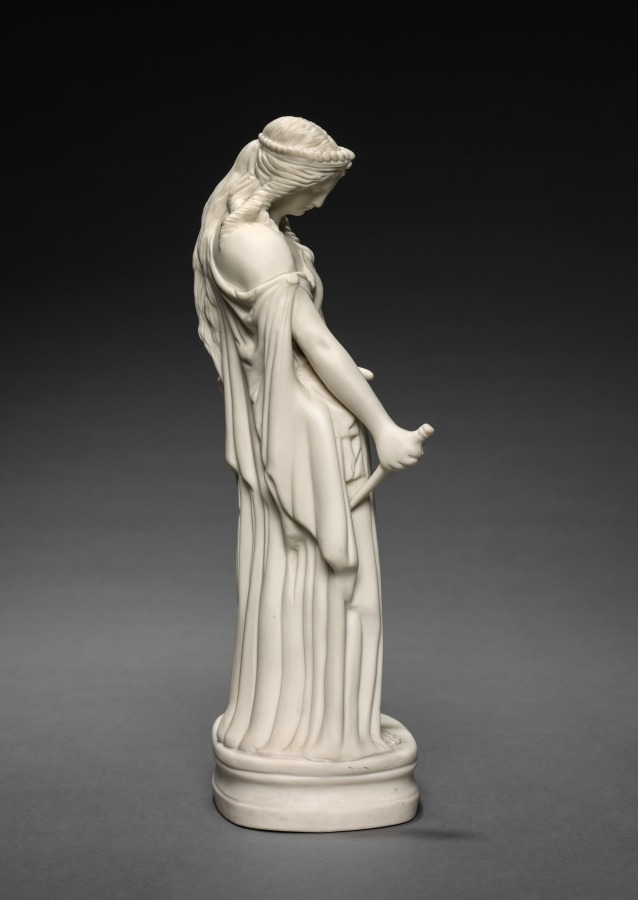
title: Figure of Medea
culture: England, 19th century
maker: W. T. Copeland & Sons (British)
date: c. 1870–1890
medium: Parian porcelain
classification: Ceramic